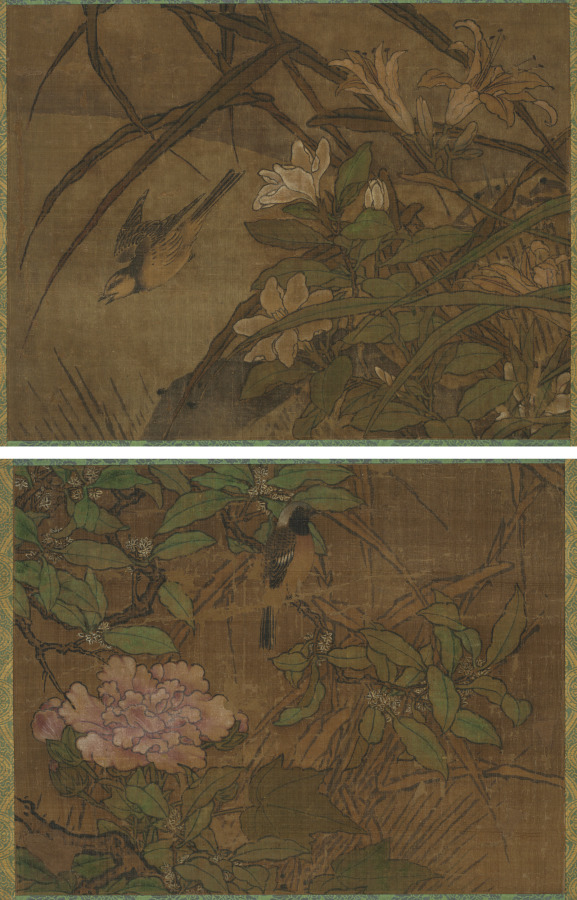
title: Birds and Flowers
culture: Japan, Muromachi period (1392–1573)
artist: attributed to Sesshū Tōyō (Japanese, 1420–1506)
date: mid-1400s-early 1500s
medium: Two hanging scrolls from a triptych; ink and color on silk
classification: Painting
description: These two paintings are possibly by Sesshū Tōyō. They once flanked a central scroll with an ink landscape. The unbalanced nature of the compositions, however, suggests they may be images recycled from larger paintings. The one with sweet osmanthus and hibiscus is an autumn scene, the other is a summer scene with daylilies and gardenias. Folding screens often contrast two seasons or depict all four across a single pair of screens. Sesshū’s works were sufficiently prized that repurposing them in fragmentary form to display in an alcove of a luxurious room would not be an unusual choice.